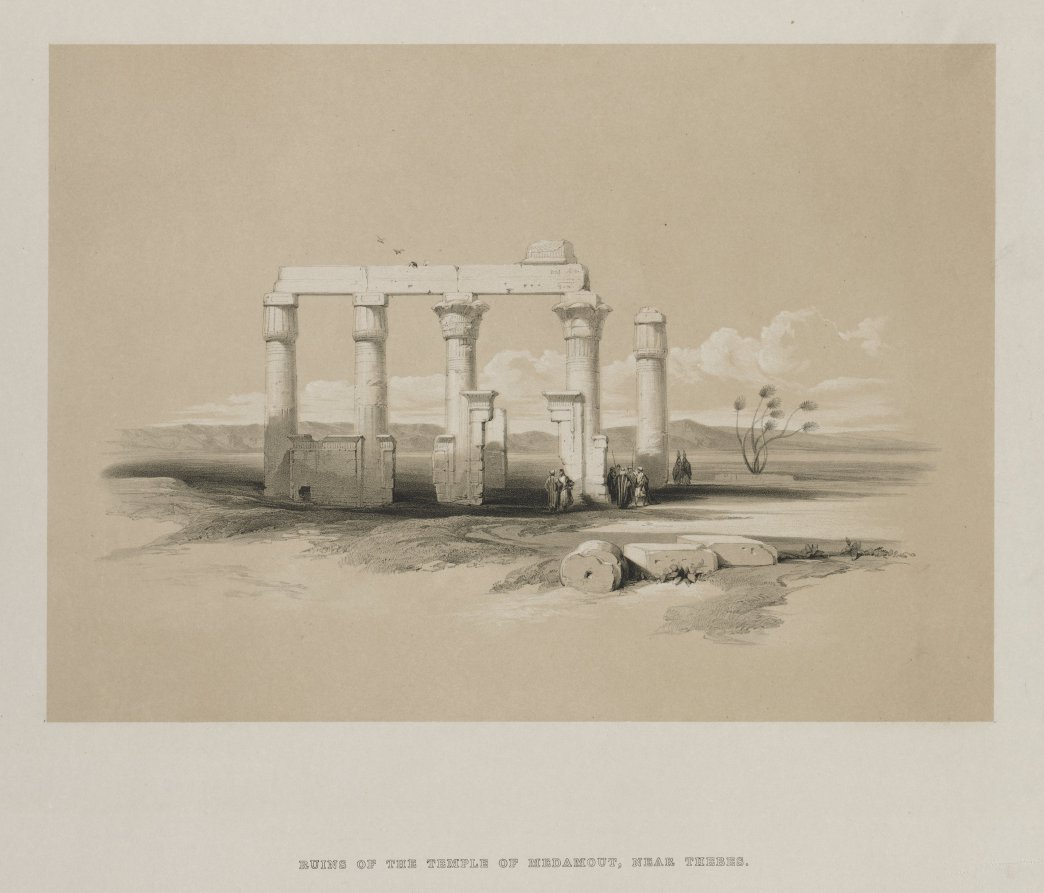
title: Egypt and Nubia, Volume II: Ruins of the Temple of Madamoud, at Thebes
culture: England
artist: Louis Haghe (British, 1806–1885)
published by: F. G. Moon, 20 Threadneedle Street, London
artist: after David Roberts (Scottish, 1796–1864)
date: 1847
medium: color lithograph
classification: Print